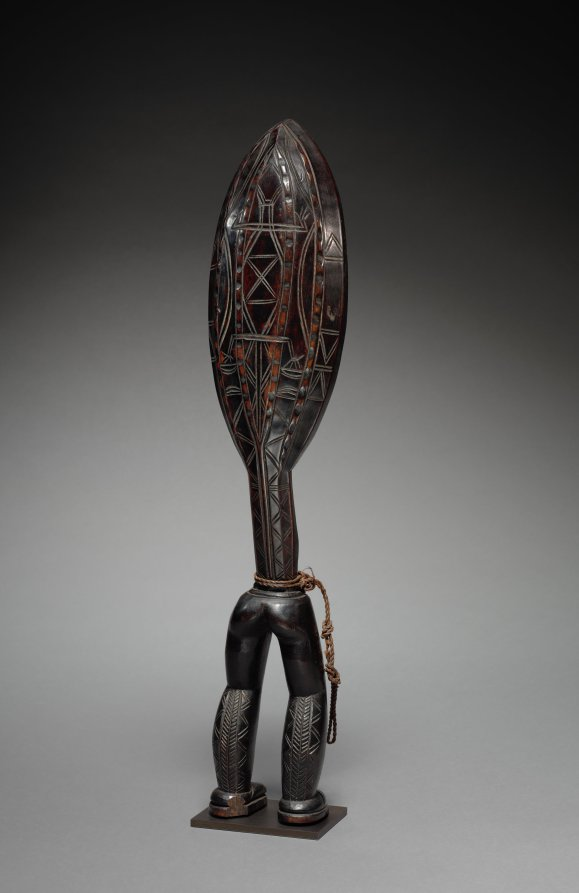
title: Ceremonial Ladle (Wunkirmian or Wakemia)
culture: Africa, West Africa, Côte d'Ivoire, Dan-style carver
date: possibly late 1800s or early 1900s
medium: Wood, twine, and possibly resin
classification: Sculpture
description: An emblem of great prestige, this human-shaped ladle would have been owned by a distinguished married woman recognized for her talents as a farmer and her exceptional generosity and hospitality. One of her responsibilities was to host a grand Feast of Merit when she, along with other highly respected women, prepared food for a large number of local and foreign guests. During the feast the women danced brandishing their rice-filled ladles while singing in strident voices.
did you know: This ladle was a status symbol for a notable woman.